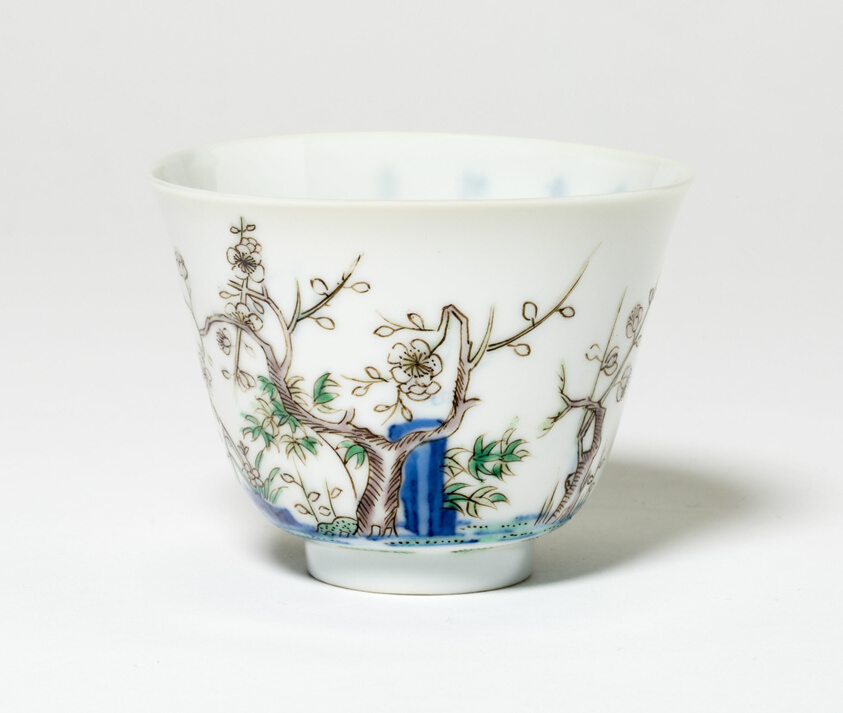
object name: Vessel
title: Cup with Plum Blossoms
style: Chinese (culture or style)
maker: China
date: Qing dynasty (1644–1911), Kangxi reign mark and period (1662–1722)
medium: Porcelain with underglaze blue and overglaze enamel decoration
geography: China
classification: drinking vessel; porcelain; asian art; ceramics; vessel